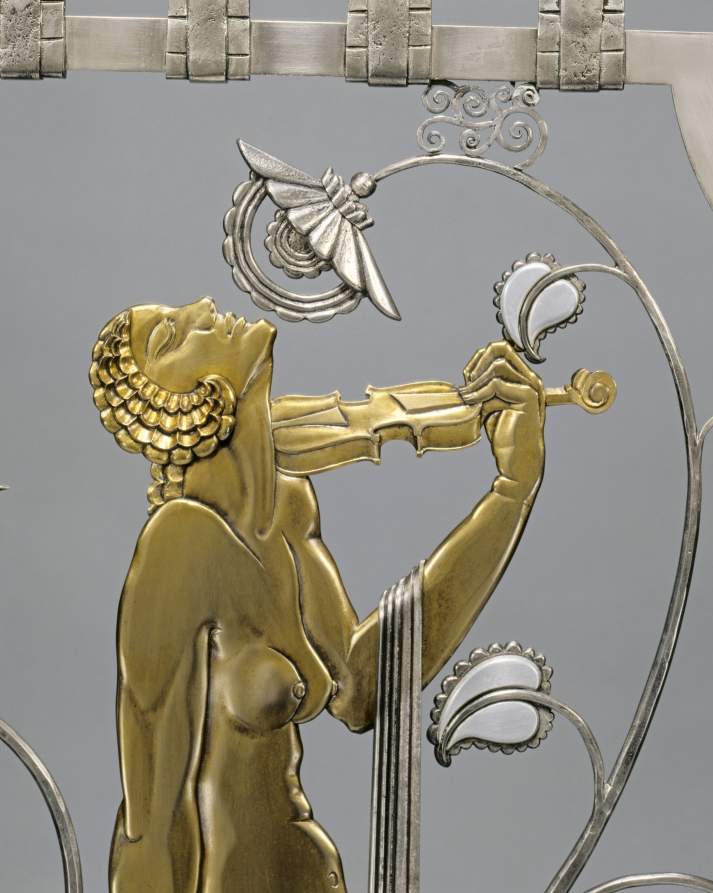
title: Muse with Violin Screen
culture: America, Ohio, Cleveland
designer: Paul Fehér (American, born Hungary, 1898–1990)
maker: Rose Iron Works (America, Ohio, Cleveland, est. 1904)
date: 1930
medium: Steel, brass; silver and gold plating, cotton velveteen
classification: Metalwork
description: Since the early years of the 20th century, the Rose Iron Works, a Cleveland supplier of architectural ornament, has produced distinguished metalwork. The company’s founder, Martin Rose, was born in Austria-Hungary and studied ornamental metalsmithing in Vienna prior to immigrating to Cleveland in 1902. In the 1920s, he hired a talented young Parisian designer, Paul Fehér, to work for the firm. Fehér’s designs, culminating in this massive screen, brought a modern European sensibility to the Rose Iron Works production. With its geometric patterning, highly stylized and abstracted natural forms, and the central figure reminiscent of the celebrated jazz singer Josephine Baker, this screen reflects the classic motifs of Art Deco design.